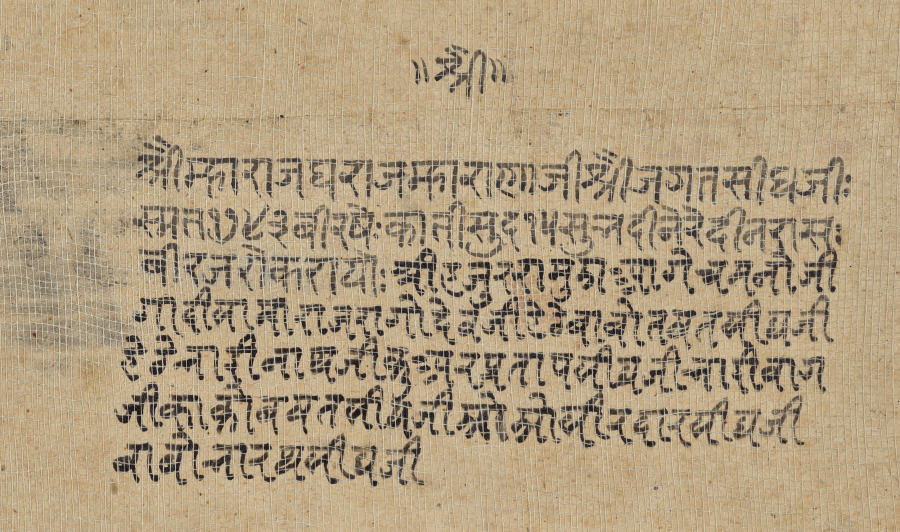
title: Maharana Jagat Singh Attending the Raslila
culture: Northwestern India, Rajasthan, Mewar, Udaipur, 18th century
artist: attributed to Jai Ram (Indian, active 1710–40)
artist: and/or Jiva (Indian, active mid-1700s)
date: 1736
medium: Gum tempera, gold, and silver on paper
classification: Painting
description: To celebrate the New Year festival of Diwali, dancers reenact the life story of the Hindu god Krishna in a palace courtyard by candlelight under the full moon. The king, a vassal of the Mughal emperor, sits with the halo of divine sanction for his rule at the left of the courtyard, smoking from a golden goat-shaped hookah, with his young son and heir at his side. At the top of the composition, a dancer dressed in blue with a peacock-feather crown plays the part of Krishna. In the upper right corner, a canopy painted with swirling storm clouds stands for the rainstorm sent by the jealous king of the gods, who is shown in the middle of the canopy with his consort and mount, the elephant with seven trunks. Guards and grooms in the foreground entertain themselves with music while they wait with the horses of visiting nobles. The formal geometric gardens, playful use of perspective, and individualized portraiture indicate the selective adoption of the styles and sensibilities of the imperial Mughal court in the paintings from this large-format series.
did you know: This painting is one of a set of eight.